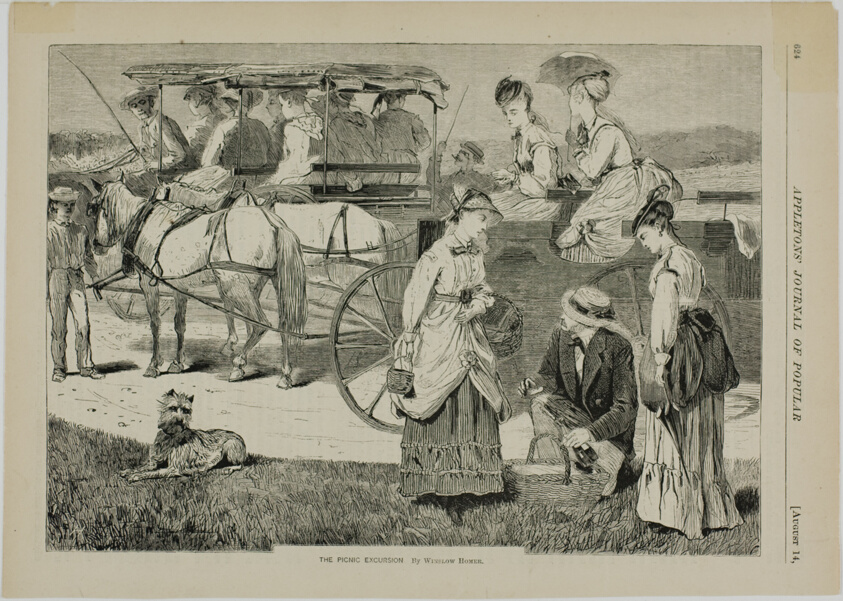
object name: Print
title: The Picnic Excursion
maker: Winslow Homer (American, 1836-1910); published by Appletons' Journal (American, 1869-1881)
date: published August 14, 1869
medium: Wood engraving on paper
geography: United States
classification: wood engraving; print; prints and drawing